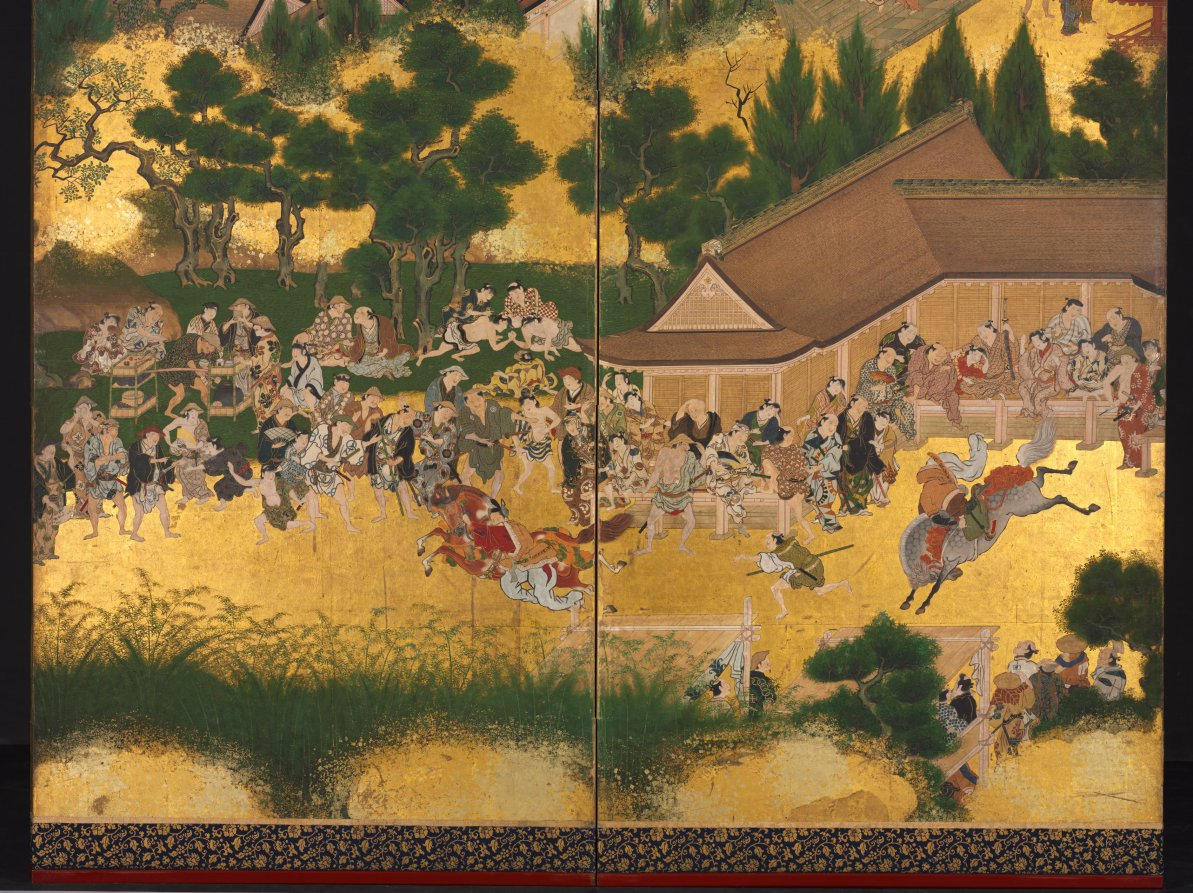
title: Horse Race at the Kamo Shrine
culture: Japan, Edo period (1615–1868)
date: early to mid-1600s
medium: One of a pair of six-panel folding screens; ink and color on gilded paper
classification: Painting